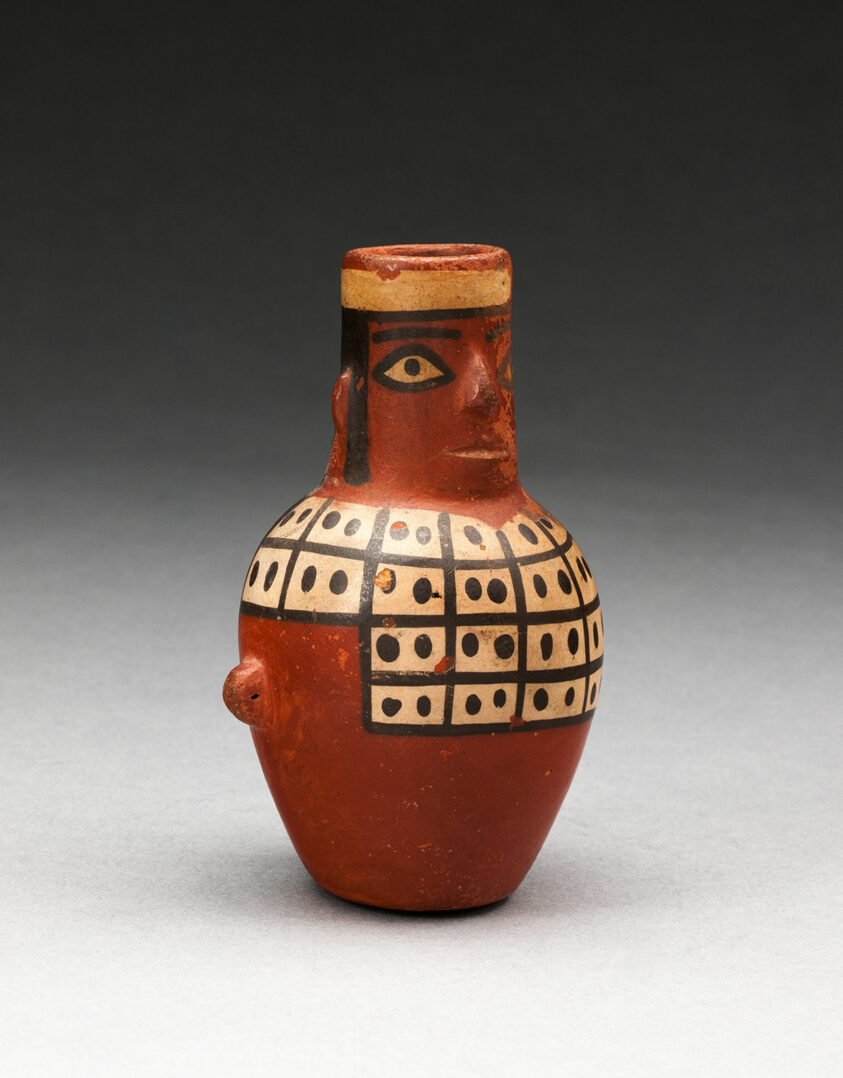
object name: Vessel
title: Miniature Jar in the Form of a Figure Wearing a Tunic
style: tiahuanaco, middle horizon, Pre-Columbian, americas, Arts of the Americas, andean, andes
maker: Tiwanaku-Wari; South coast Peru or northern Bolivia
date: 600–1000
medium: Ceramic and pigment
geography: Bolivia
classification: earthenware; ceramics; vessel; art of the americas